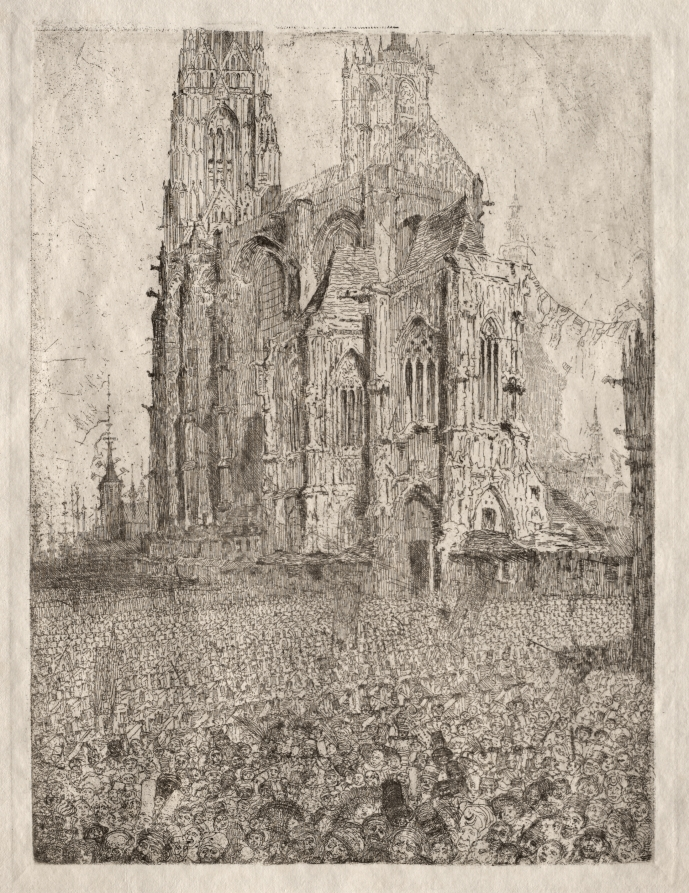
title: The Cathedral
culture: Belgium, 19th century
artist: James Ensor (Belgian, 1860–1949)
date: 1886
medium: etching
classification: Print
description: James Ensor used tiny, repetitive marks possible with etching to develop a new, expressive style that contrasted with that of most of his contemporaries. The Gothic architecture, worn facade, and overwhelming scale of the cathedral seen here in exacting detail show that it has withstood the test of time. Ensor juxtaposed the building with a dense crowd of grotesque figures that push forward seemingly irrationally, presenting a symbolic contrast between their whims and the permanence of both the church and the past.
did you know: This etching was Ensor’s most popular, and he eventually issued it in two versions; the Cleveland Museum of Art's rare impression is among the first that he printed.